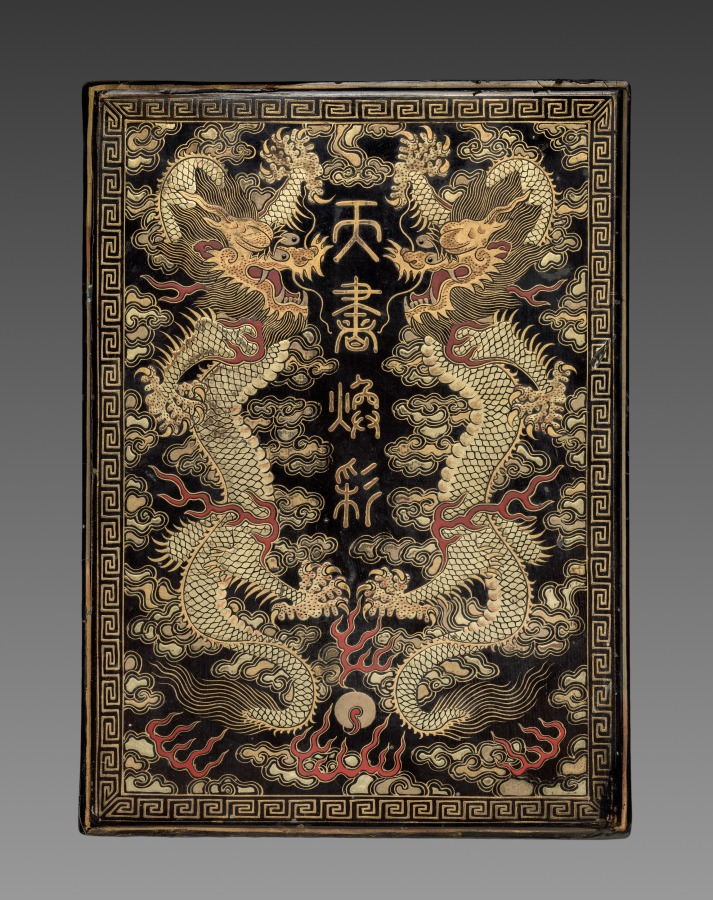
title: Box with Ink Cakes (lid)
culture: China, Qing dynasty (1644-1911), Jiaqing reign (1795-1820)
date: 1795–1820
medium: lacquer and silk box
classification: Lacquer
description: Ink cakes (also called ink sticks) are dissolved with the addition of water and then ground on the surface of a flat square stone into liquid ink for painting and calligraphy. The precious ink cakes here, however, have never been used. The inscription on the side of the blue ink cake says that the set was commissioned by Chen Huai, governor of Jiangxi province.